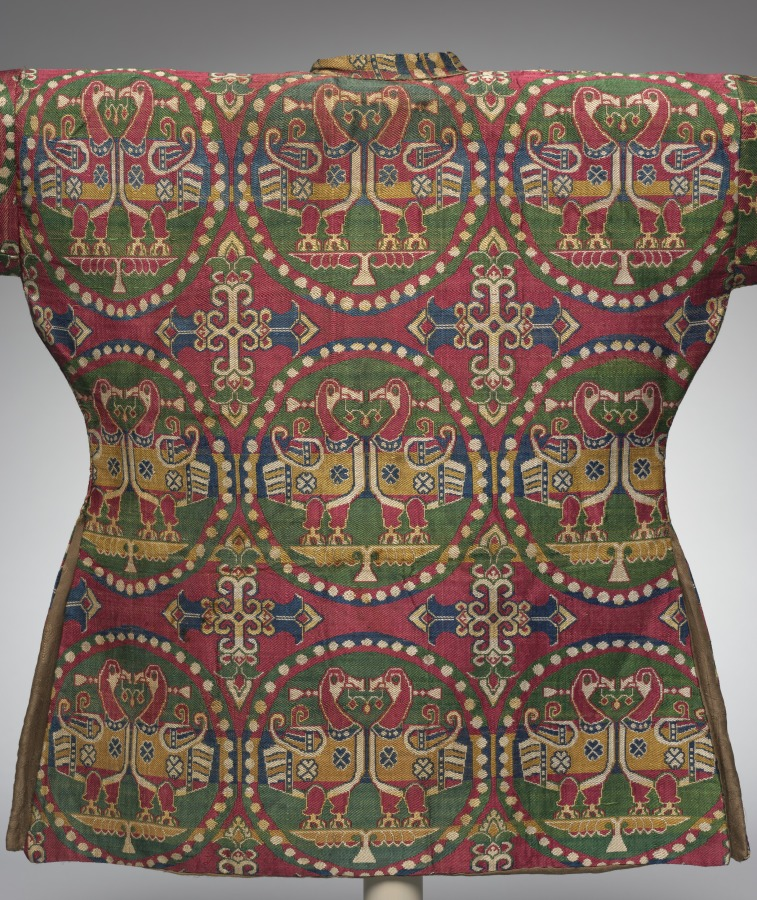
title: Child’s Coat with Ducks in Pearl Medallions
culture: Probably Sogdia (present-day Uzbekistan); China, Tang dynasty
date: 700s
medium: Silk: weft-faced compound twill weave (samite)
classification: Garment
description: The coat’s outer fabric is woven in five brilliant colors featuring paired ducks in pearl roundels, hallmarks of the precious and highly desired silks from Sogdia. The coat’s inner lining is a twill damask with a floral pattern made in China. The combination of Sogdian and Chinese silks in one garment with Tibetan ownership history is evidence of the vital exchange and cultural interaction among the peoples living along the trade routes of the Silk Road. This precious coat was presumably made for a Tibetan prince. Given the coat’s pristine condition, though, it is unclear whether the garment was ever worn, or was used as a diplomatic gift or perhaps as currency.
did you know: This coat is part of a set of garments that originally included an outer pair of pants and silk boots made from the same fabric.